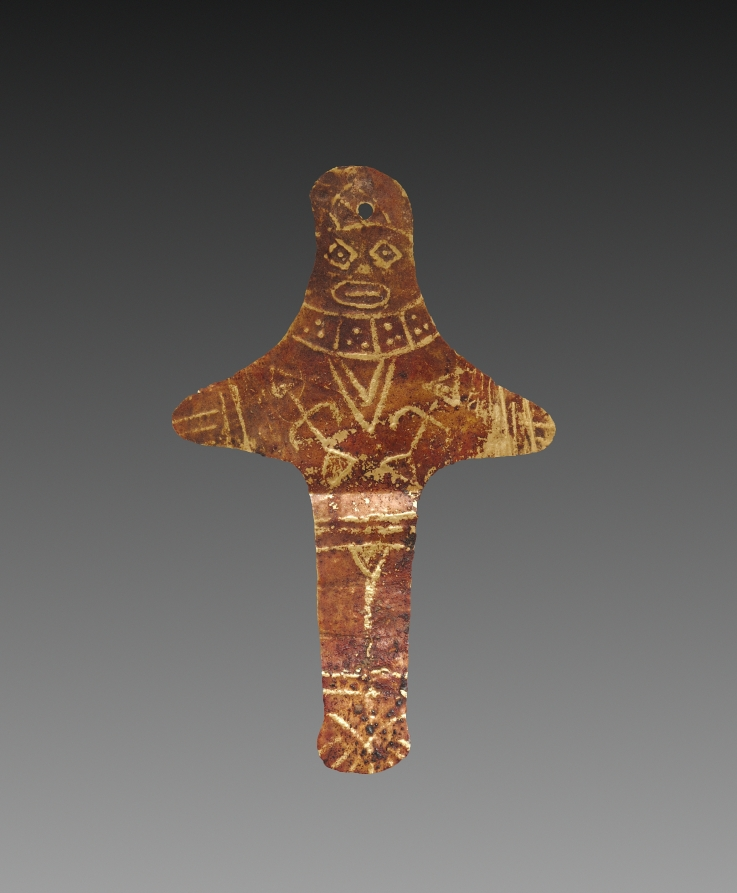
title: Figurine Plaque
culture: Peru, South Coast, Paracas, with modern etched enhancement(?)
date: c. 300 BCE–200 CE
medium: hammered and embossed gold-copper alloy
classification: Jewelry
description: This small metal ornament represents a human figure wearing a cap, a tunic decorated with bird images, and a necklace of orange-pink spondylus shell sections. Such necklaces are found in Paracas mummy bundles, and are frequently represented in Paracas embroidered images. Spondylus shell does not grow in the cold water off the coast of Peru, and had to be imported hundreds of miles from what is now Ecuador. Virtually all ancient Peruvian cultures treasured spondylus shell for its color and rarity, and as a symbol of fertility.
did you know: Tumbaga is an alloy made by blending gold with copper, which may give the gold a rosy hue.